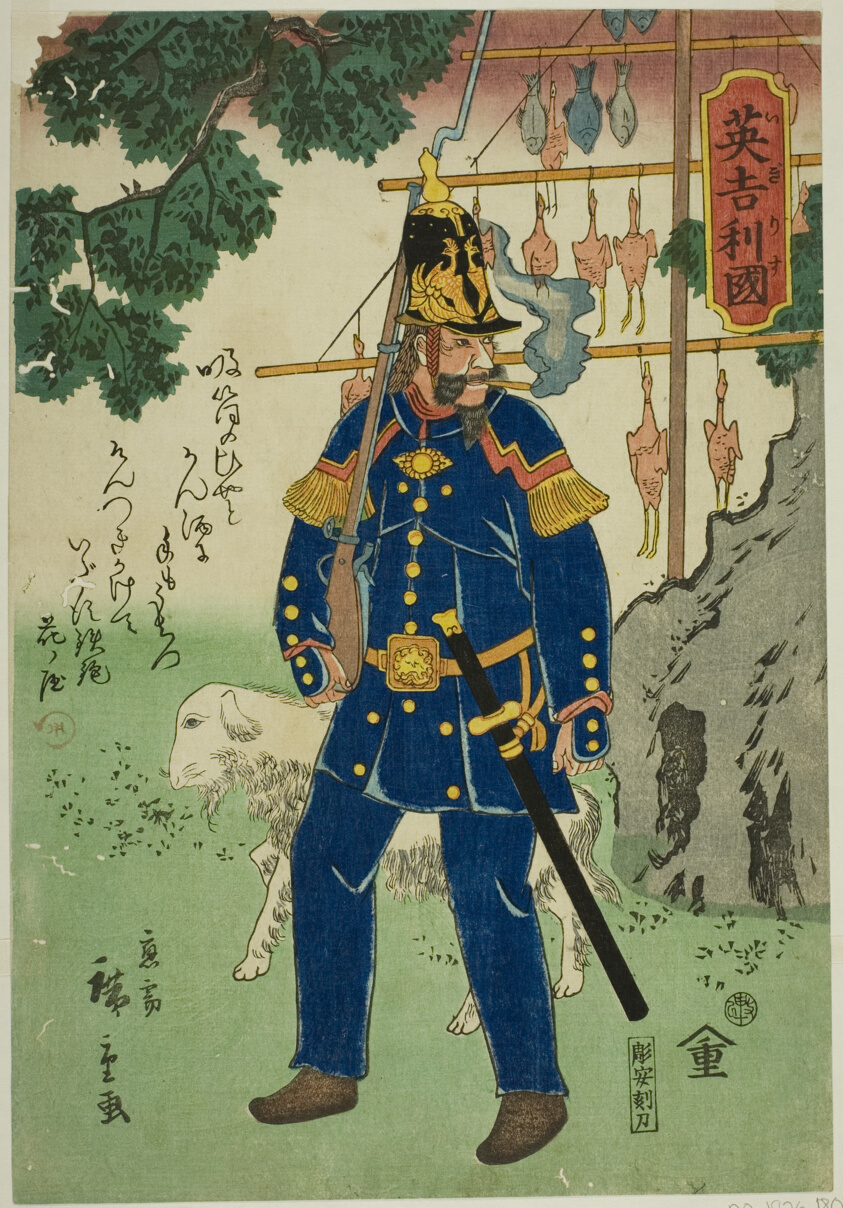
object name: Print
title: England (Igirusu)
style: Japanese (culture or style)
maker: Utagawa Hiroshige II (Shigenobu) (Japanese, 1826-1869)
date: 1860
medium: Color woodblock print; oban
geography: Japan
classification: woodblock print; print; asian art